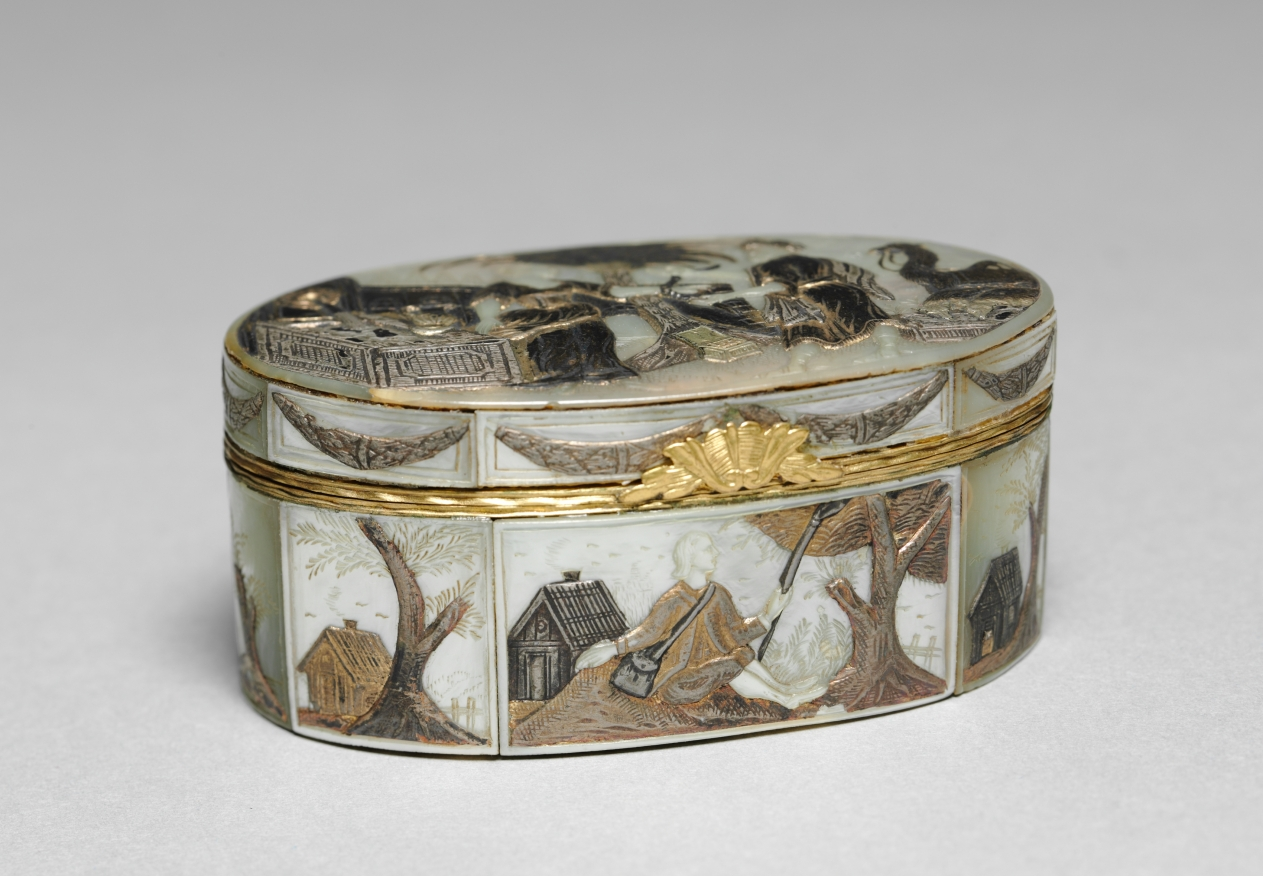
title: Snuff Box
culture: France, 18th or 19th century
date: 1700s–1800s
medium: mother-of-pearl mounted in gilt metal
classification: Miscellaneous